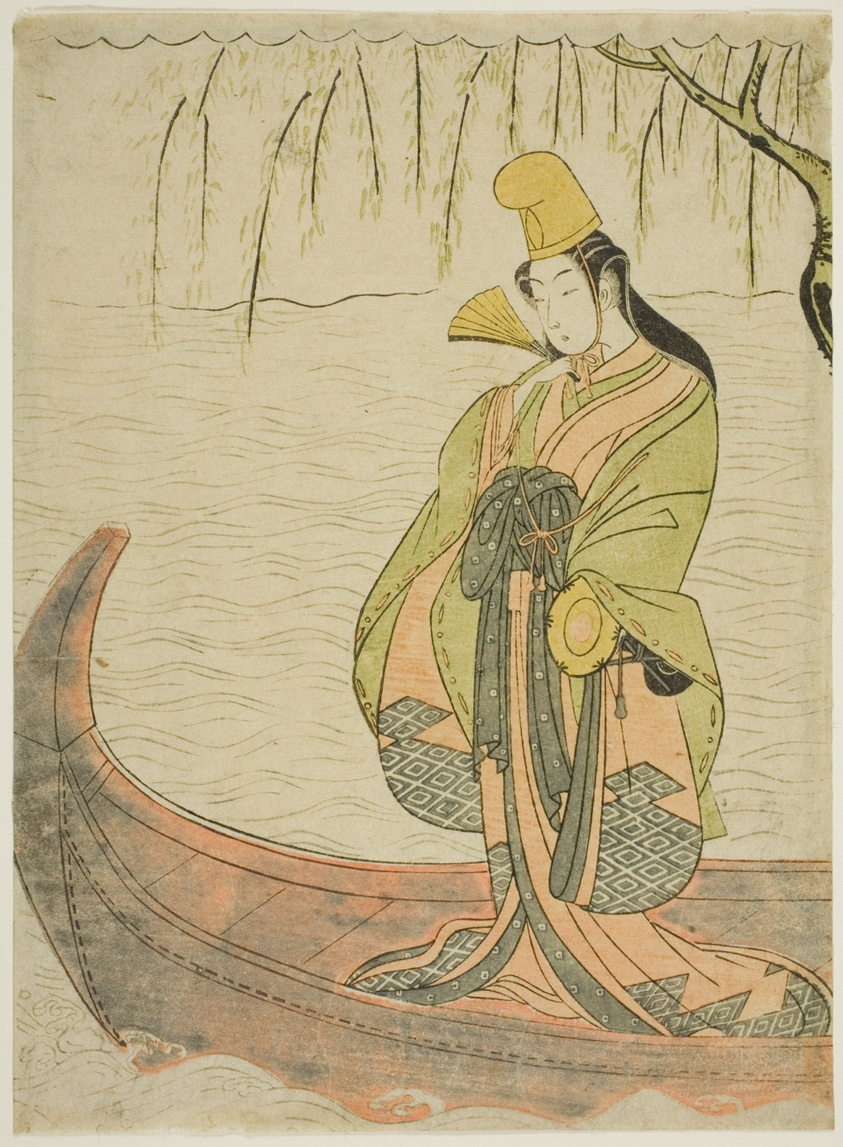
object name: Print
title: Shirabyoshi Dancer standing in Asazuma Boat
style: Japanese (culture or style)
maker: Suzuki Harunobu 鈴木 春信; Japanese, 1725 (?)-1770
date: c. 1769/70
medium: Color woodblock print; chuban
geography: Japan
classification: print; asian art